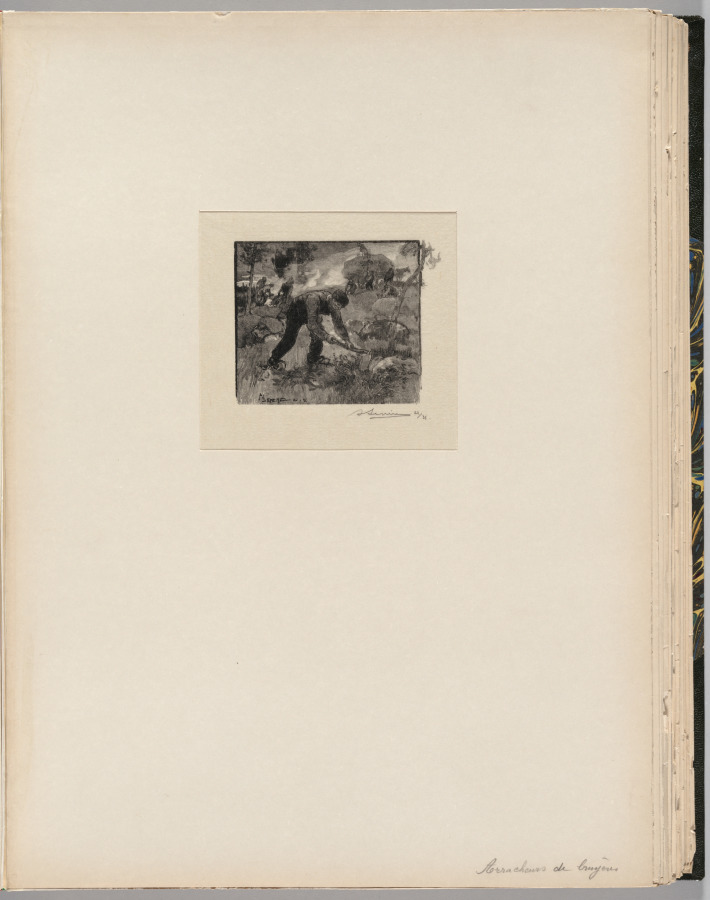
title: Fontainebleau Forest: Pulling the Heather (La Forêt de Fontainebleau: Arracheurs de Bruyères)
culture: France, 19th century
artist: Auguste Louis Lepère (French, 1849–1918)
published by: A. Desmoulins, Published in Revue Illustrée, 1887–90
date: 1890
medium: wood engraving from bound volume of 34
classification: Bound Volume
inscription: Below image, lower right, in black ink: ALepère 22/35; in block, lower left: A. LEPÈRE / Del. SC; on window mat, lower right, in graphite: Arracheurs de Bruyères